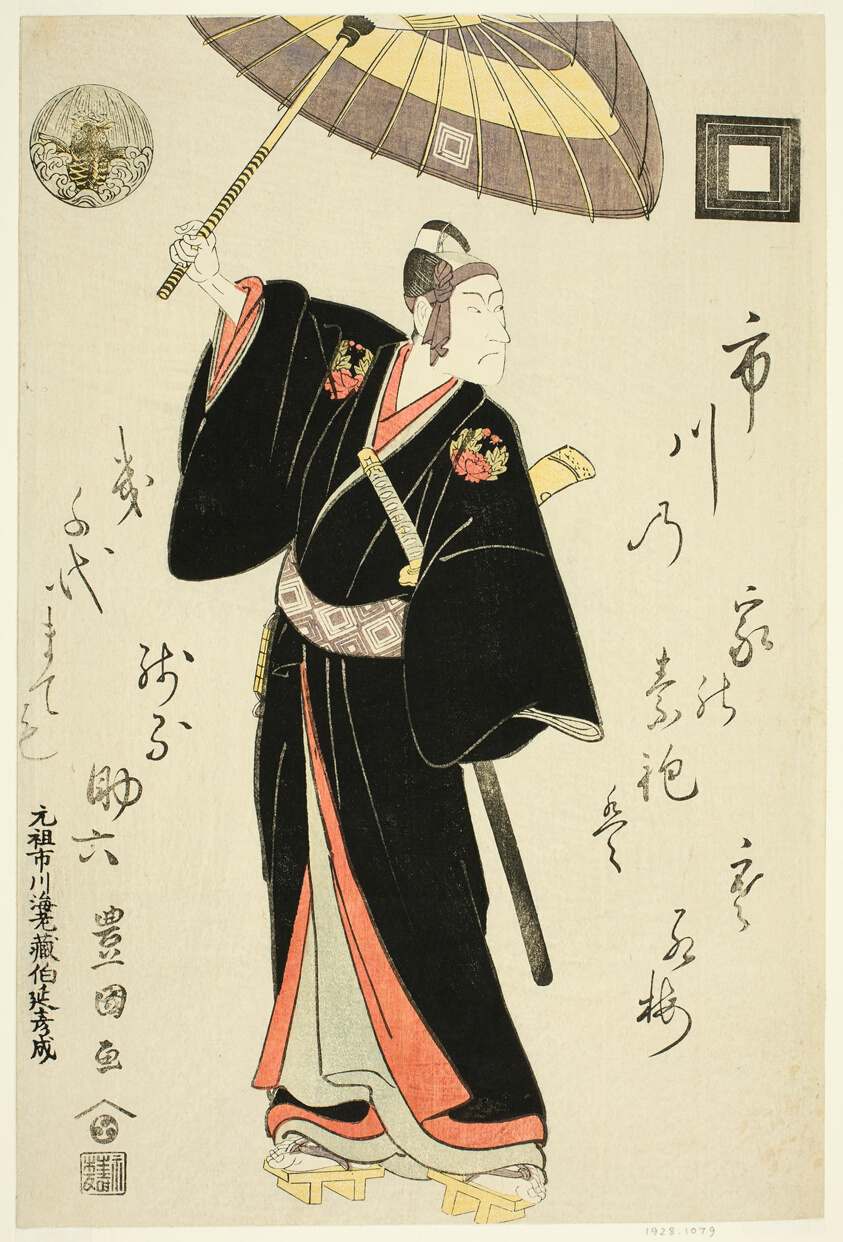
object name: Print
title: The actor Ichikawa Danjuro VI as Sukeroku in the play "Omiura Date no Nebiki," performed at the Nakamura Theater in the third month, 1799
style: Japanese (culture or style)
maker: Utagawa Toyokuni I 初代 歌川 豊国; Japanese, 1769–1825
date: c. 1799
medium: Color woodblock print; oban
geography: Japan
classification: woodblock print; print; asian art